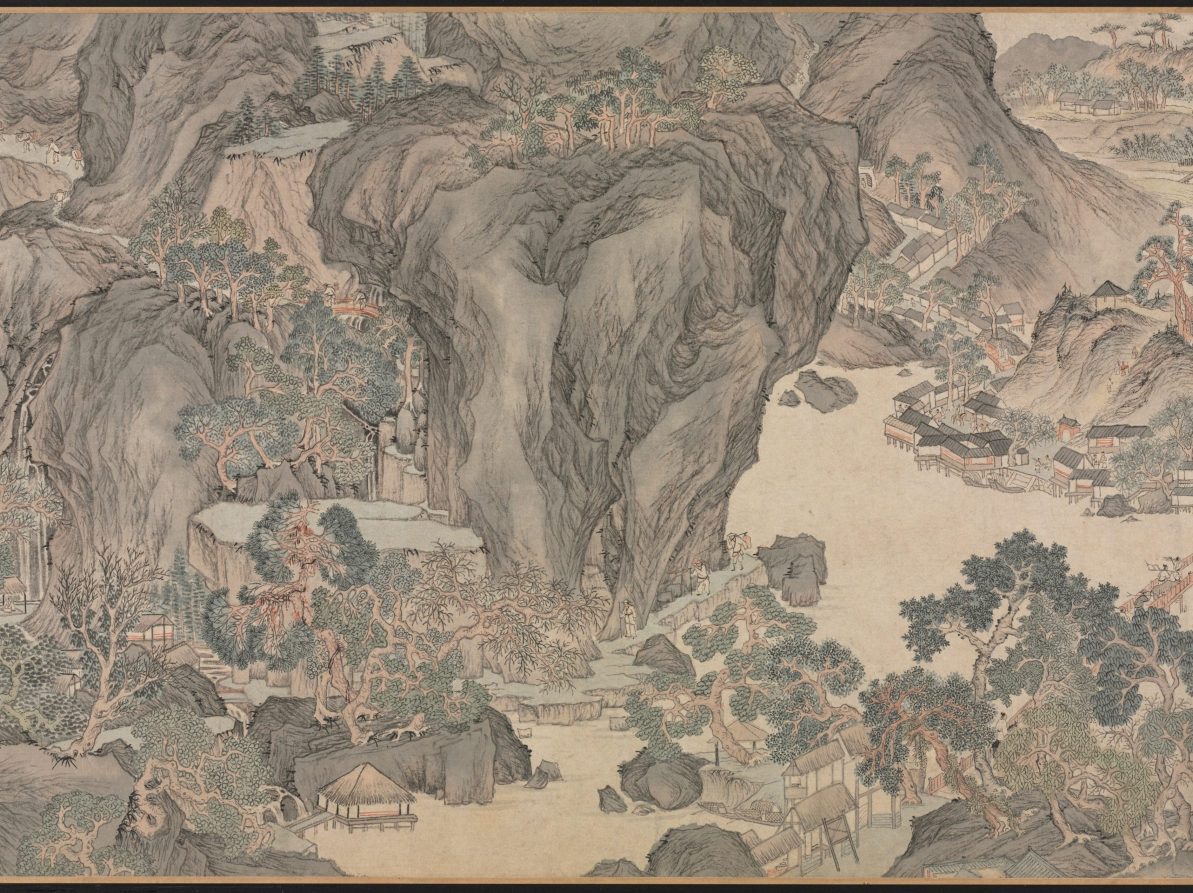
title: Greeting the Spring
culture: China, Ming dynasty (1368–1644)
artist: Wu Bin (Chinese, active c. 1591–1626)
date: 1600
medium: handscroll; ink and light color on paper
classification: Painting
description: This masterfully composed landscape in light colors and delicate brushwork is an image of the water-rich Jiangnan region in southeast China, where Wu Bin was active as an artist. Embedded in rolling hills along lakesides and streams nestle cityscapes hosting numerous spring festivities. Lantern displays and street performances in the villages salute the New Year, and are interwoven with scenes of farming, fishing, and silk making. In one scene in the middle ground, an ox made of clay under a canopy is lead in a procession to an architectural compound, a ceremony known as whipping the spring ox in hope for a good harvest. This handscroll bears five collector seals by the Qianlong emperor indicating his appreciation for the painting.